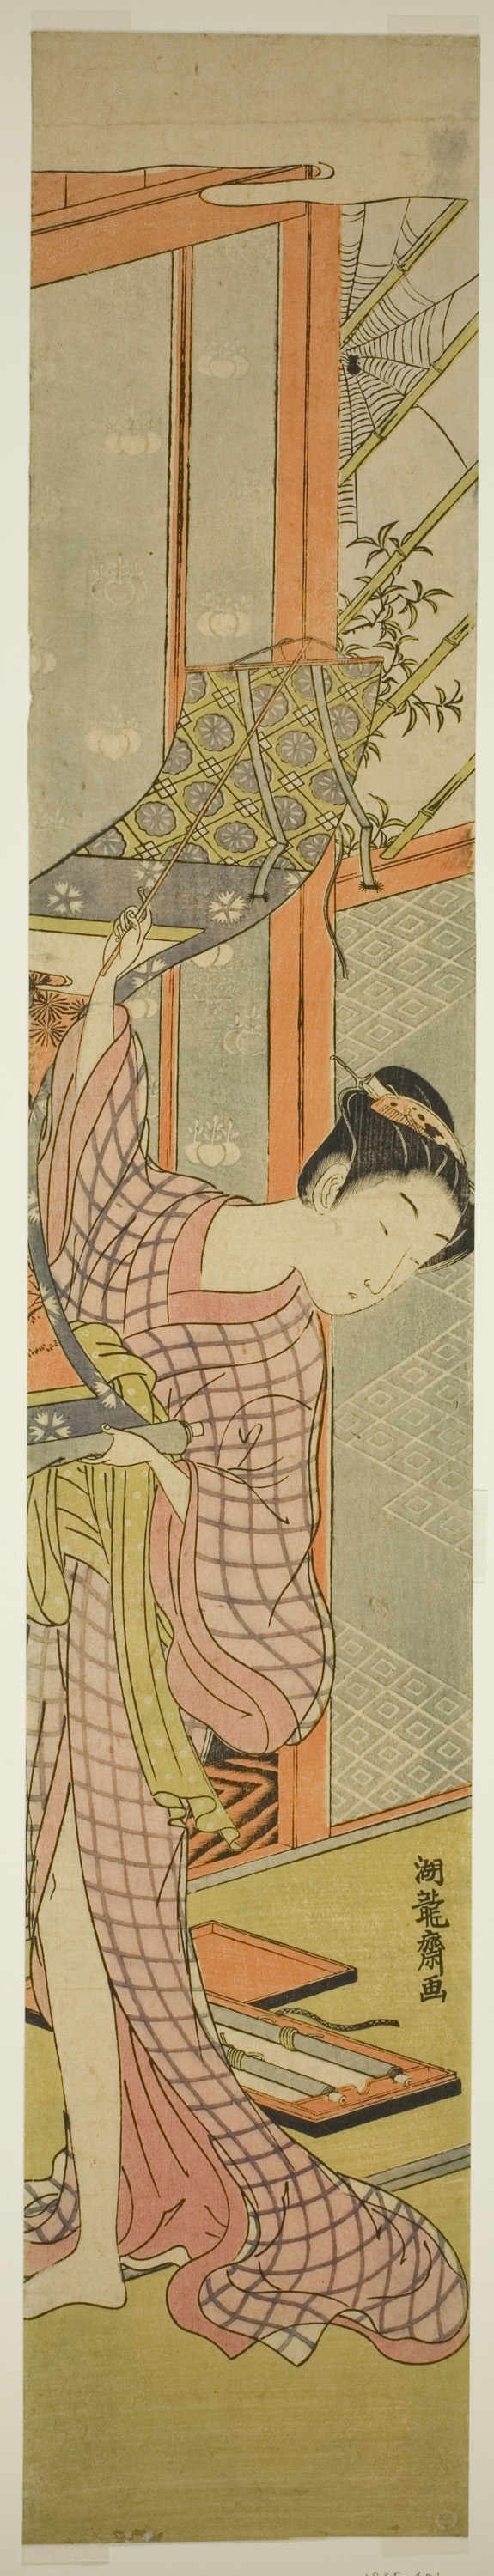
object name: Print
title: Young Woman Hanging a Painting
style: Japanese (culture or style)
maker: Isoda Koryusai (Japanese, 1735-1790)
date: c. 1771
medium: Color woodblock print; hashira-e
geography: Japan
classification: woodblock print; print; asian art